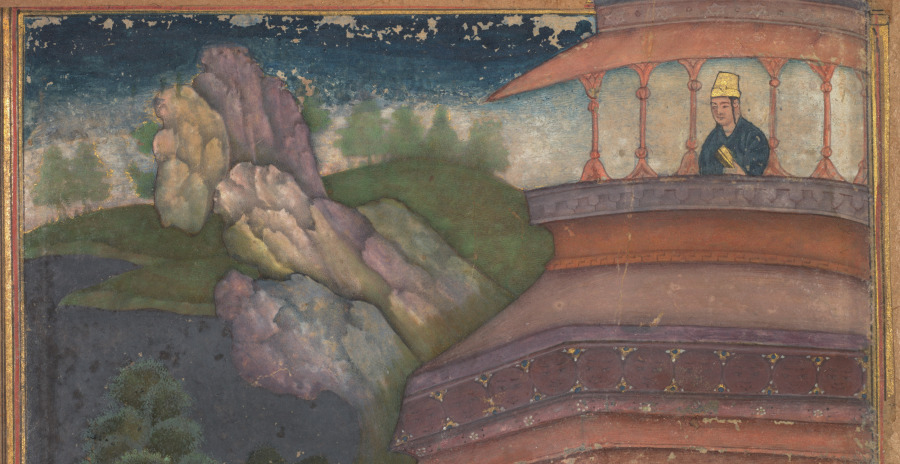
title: Mary ascends the stairs to the temple, from a Mirror of Holiness (Mir’at al-quds) of Father Jerome Xavier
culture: Mughal India, Allahabad, made for Prince Salim (1569–1627)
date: 1602–4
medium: Gum tempera, ink, color, and gold on paper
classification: Manuscript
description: Three-year-old Mary bounds up the stairs of the temple, eager to begin her education. Onlookers gesture in surprise. In the background the rocks have been cleverly shaded to look like faces—a Persian technique of visual double-entendre that the Mughals admired and adopted. This work is the second of the 27 surviving paintings made for this manuscript. The first, a scene of Mary’s birth, is in a private collection in Europe. Mary’s face had been painted with a fragile white paint, which has fallen off. Now only the underdrawing remains visible.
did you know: Mary’s instructor awaits her, book in hand, at the top of a temple of learning.